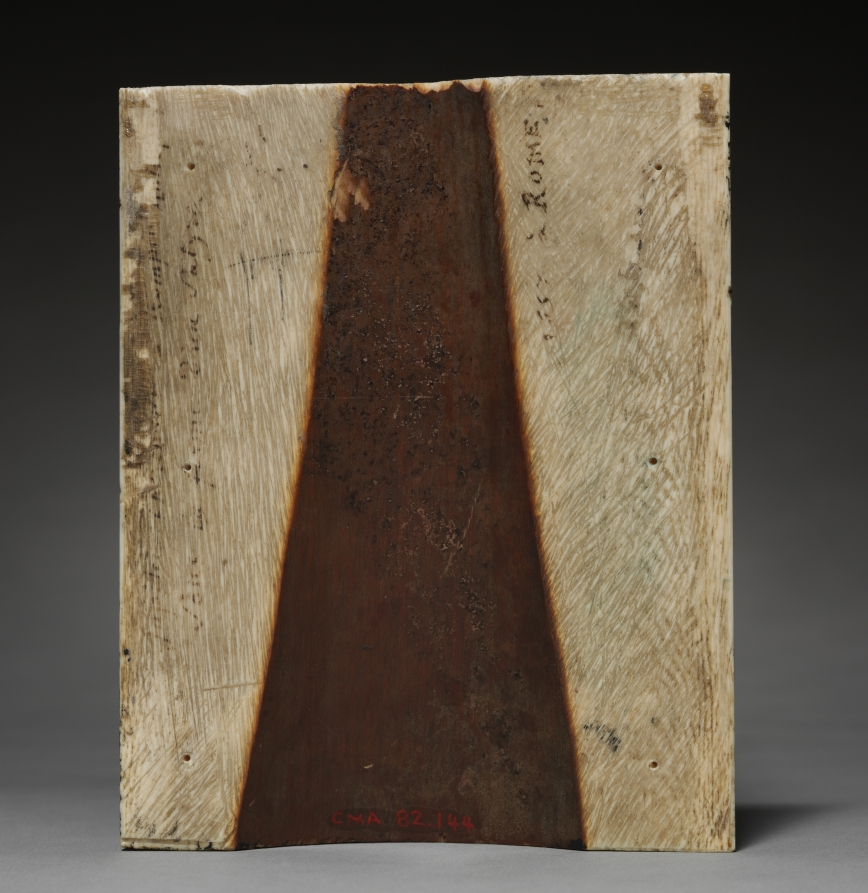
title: Venus and a Satyr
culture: Germany, late 17th-early 18th Century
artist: Ignaz Elhafen (German, 1658–1715)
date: c. 1700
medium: ivory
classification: Sculpture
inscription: inscribed in ink, almost certainly by a later hand, on back: Jupiter . . . a trompe ANTIOPE/SOUS la forme d'un Satyre/16 (?) 7 à Rome.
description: Elhafen depicted mythological scenes in many small ivory reliefs intended for domestic decoration. As with any work in ivory, the size of the tusk dictated this relief’s scale.